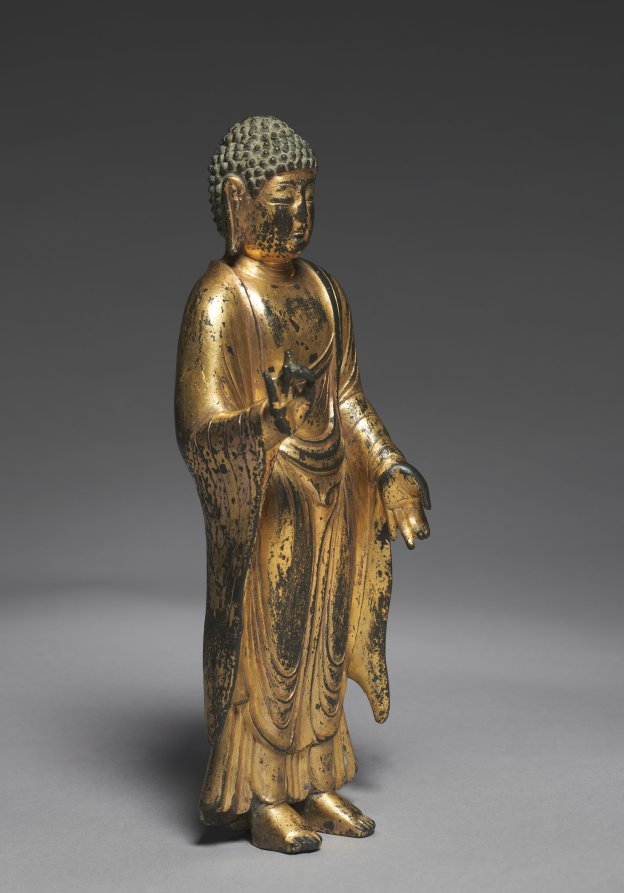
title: Standing Amitabha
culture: Korea, Unified Silla period (676-935)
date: 800s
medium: gilt bronze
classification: Sculpture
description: Buddhist teachings emphasize the pursuit of spirituality, rather than physicality, to achieve enlightenment. This statue’s artist, however, made genuine efforts to represent the divine’s beautiful voluminous body. Inspired by Indian Gupta period art (300s–500s CE), this particular artistic style emphasizing soft modeling and naturalism was further developed in China and flourished across East Asia.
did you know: This Korean statue has a stylistic affinity with statues from the Indian Gupta period (300s–500s CE) that emphasize soft modeling and naturalism.